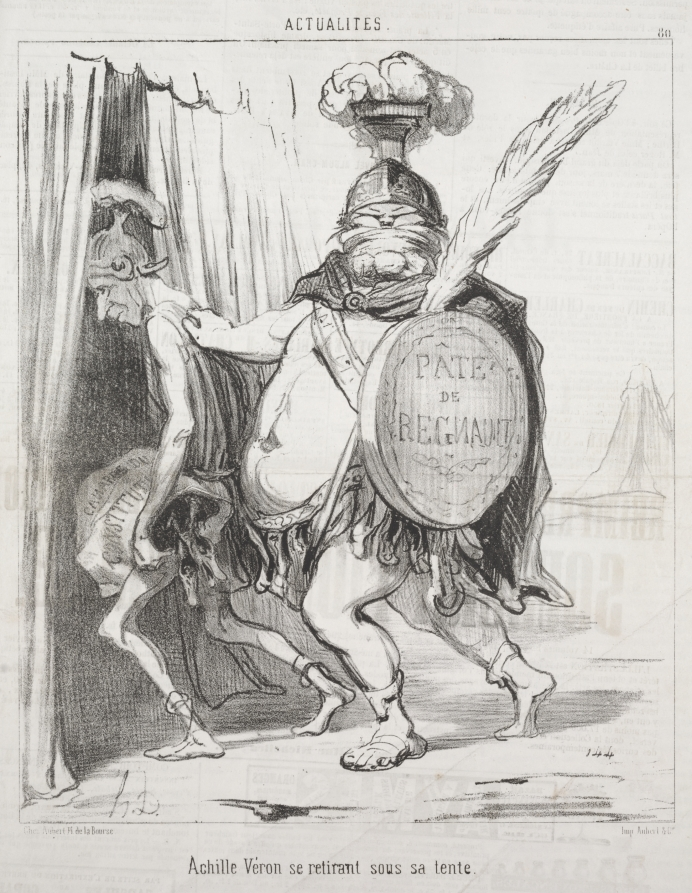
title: Achilles Véron withdrawing into his tent.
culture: France, 19th century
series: News of the Day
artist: Honoré Daumier (French, 1808–1879)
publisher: Aubert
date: 1850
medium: lithograph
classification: Print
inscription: Above image, printed: ACTUALITÉS. / 80 ; Below image, printed: Achille Véron se retirant sous sa tente.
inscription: Lower margin, printed: Chez Aubert Pl. de la Bourse / Imp Aubert & Cie. ; lower margin in pencil: Good imp. / Del. VI. 1991, only state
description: This print was published in Le Charivari (March 01, 1850) as plate 80 from the series News of the Day.